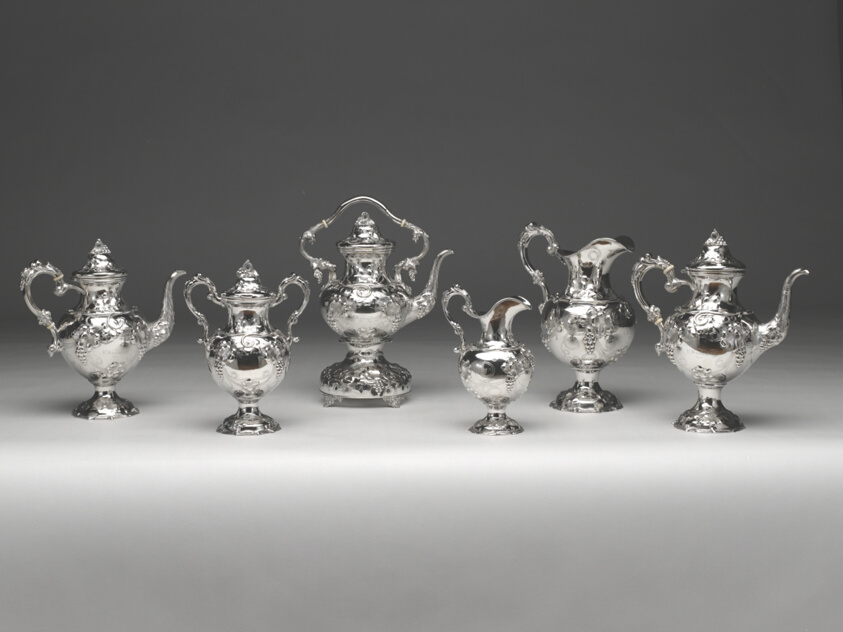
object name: Metalwork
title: Tea and Coffee Service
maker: Francis W. Cooper; American, active 1840–1851; New York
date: 1840–51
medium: Silver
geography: New York City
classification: tea service; silver; american decorative arts; american arts; decorative arts